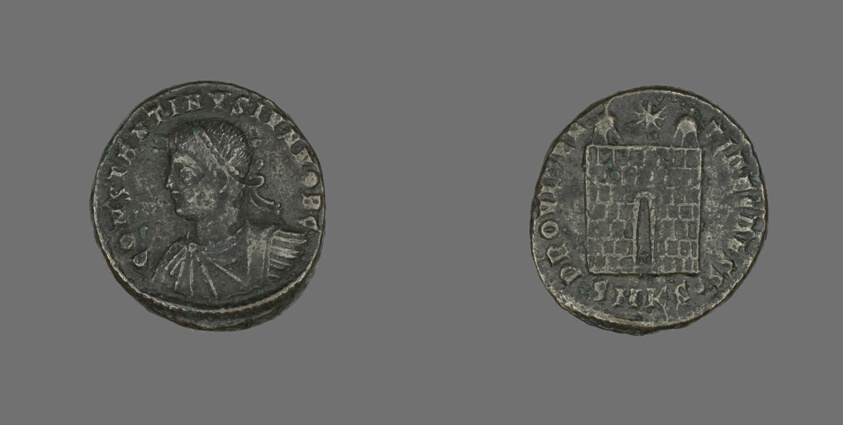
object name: Coin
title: Coin Portraying Emperor Constantine I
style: roman (ancient, style or period), ancient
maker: Roman, minted in Cyzicus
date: 307-337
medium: Bronze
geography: Roman Empire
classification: coin; ancient art